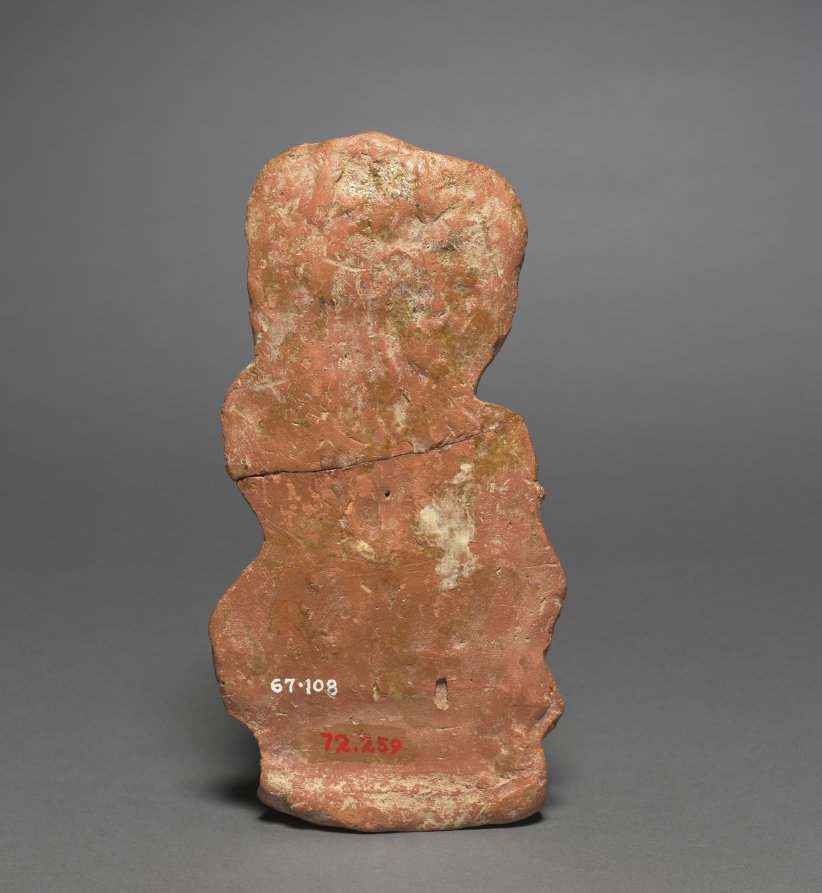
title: Nature Divinity (Yakshi) with Dwarf Hermaphrodite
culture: India, Shunga period (185–78 BCE)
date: c. 100 BCE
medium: terracotta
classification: Sculpture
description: Nature divinities, or yakshis, are associated with the life-giving forces of plants, so her headdress includes a dramatic array of leaves and flowers. Her companion, a female figure with male genitalia, is a dwarf who has connections with the fecundity of the earth. Terracotta figurines were often venerated in domestic shrines for the ongoing prosperity of the family.